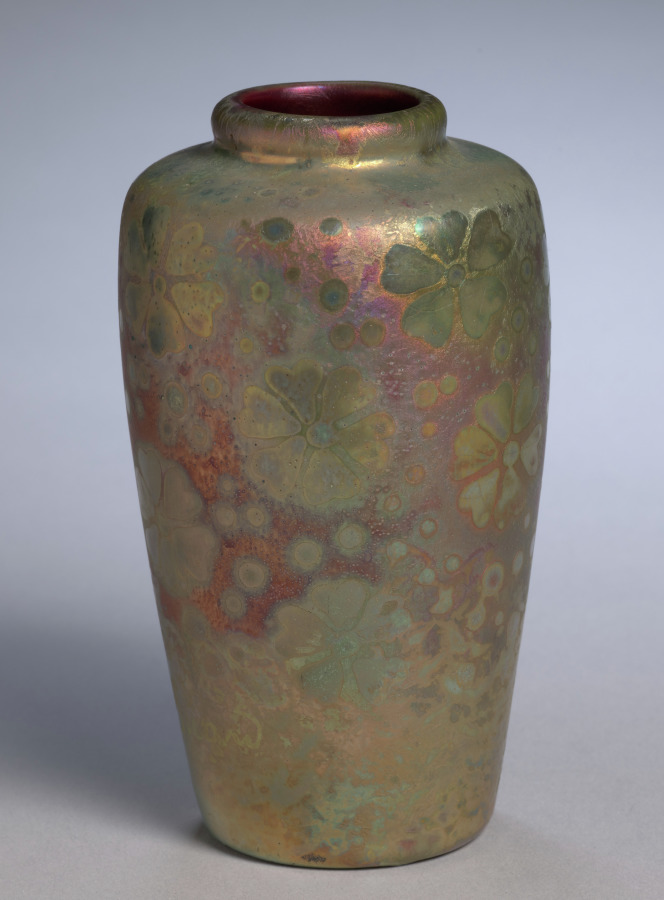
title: Vase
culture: America, Ohio, Zanesville, early 20th Century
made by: Weller Pottery (American)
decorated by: Jacques Sicard (French, 1865–1923)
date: early 1900s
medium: earthenware decorated with lustre glazes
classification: Ceramic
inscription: inscribed on side near bottom: "Weller/Sicard."